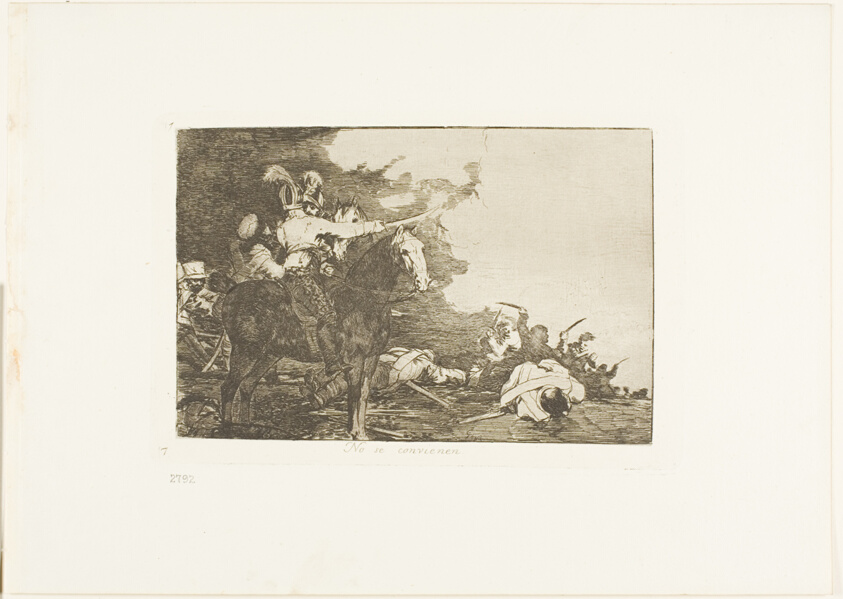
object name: Print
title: They Do Not Agree, plate 17 from The Disasters of War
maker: Francisco José de Goya y Lucientes (Spanish, 1746-1828)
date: 1810/12, published 1863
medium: Etching, drypoint, burin and burnishing on ivory wove paper with gilt edges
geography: Spain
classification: etching; print; prints and drawing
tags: war